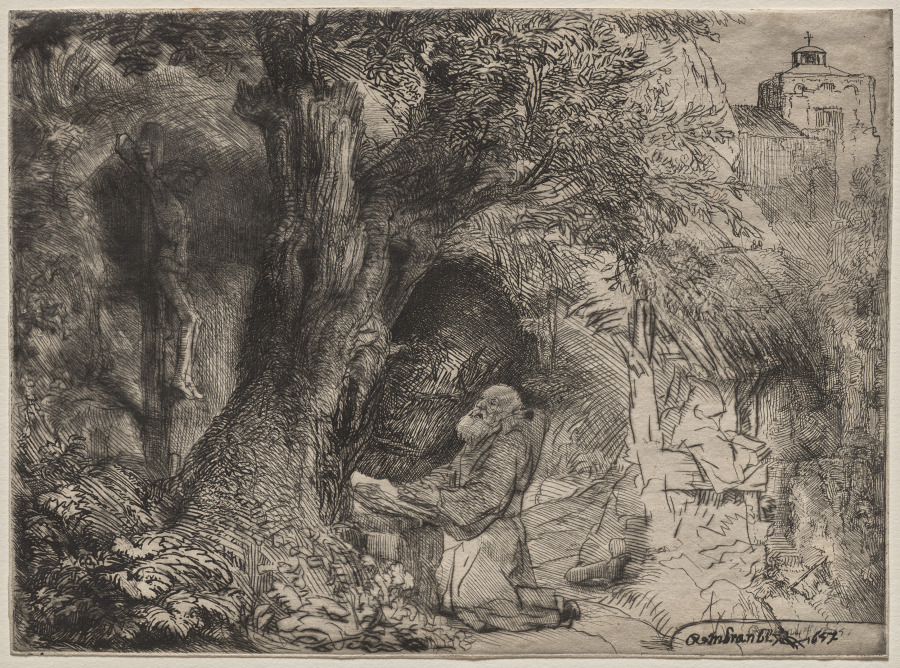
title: St. Francis Beneath a Tree Praying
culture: Netherlands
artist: Rembrandt van Rijn (Dutch, 1606–1669)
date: 1657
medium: drypoint and etching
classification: Print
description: One of Rembrandt’s most spiritually moving works, this drypoint and etching depicts a hermit saint sequestered in the wilderness and praying to a crucifix. A second figure on the right, a monk in bare outline, helps to identify the saint as Francis, who traveled with a friar named Brother Leo. Rembrandt focused on the lush, moody landscape surrounding the crucifix, creating space to the right of the composition by portraying a distant hill and structure. These compositional strategies reveal his knowledge of Venetian landscapes by Titian and others, which he had studied through prints and drawings. But while Rembrandt certainly looked to Italian art for inspiration and ideation, he always transformed what he saw into something distinctive and undeniably of his own invention, infused with the emotion and humanity that we see, for example, on the saint’s active face.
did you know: Always experimental, Rembrandt created this print by first sketching in the composition with drypoint and then adding etching in a second stage, which reversed his typical process.